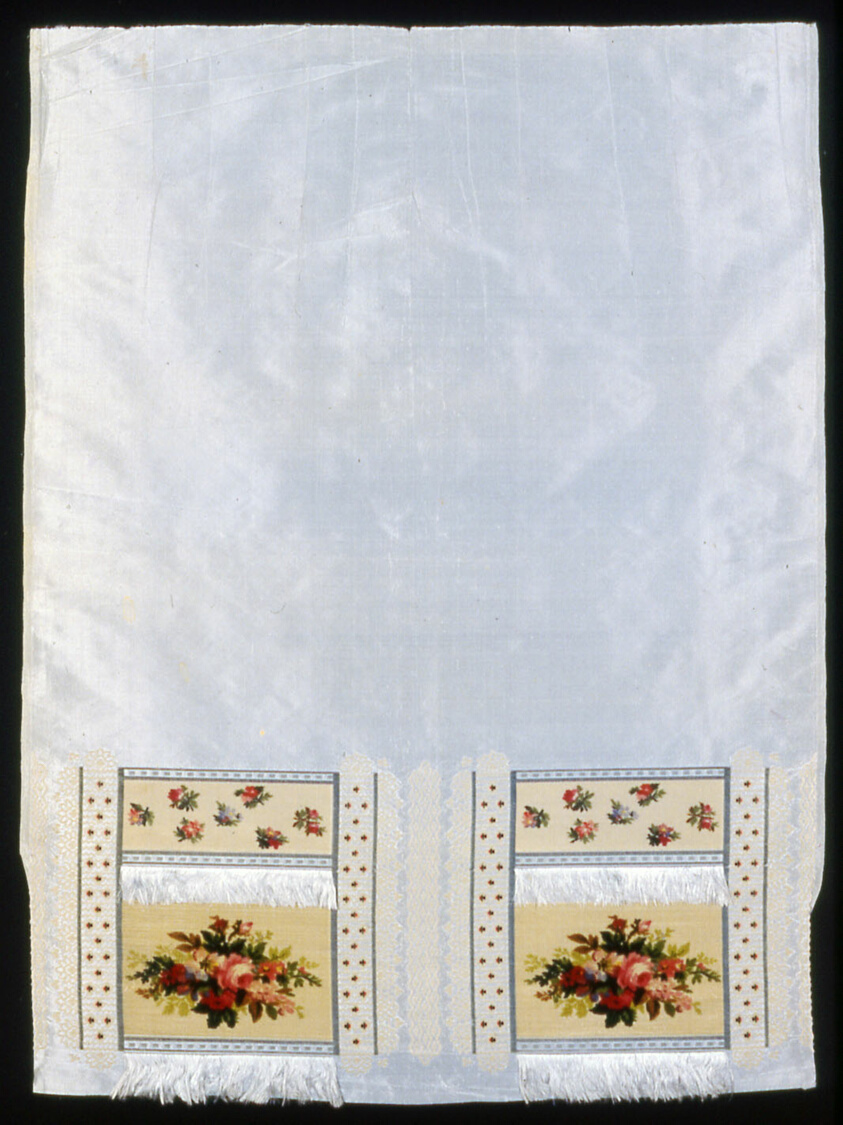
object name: Textile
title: Skirt Panel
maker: France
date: c. 1840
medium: Silk, plain weave with supplementary discontinuous pile warps forming cut and uncut voided velvet; fringe is extended lengths of pile warps; warp ainted appearance (chine)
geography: France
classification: textile; weaving; costume; weaving - velvet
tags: floral arrangements